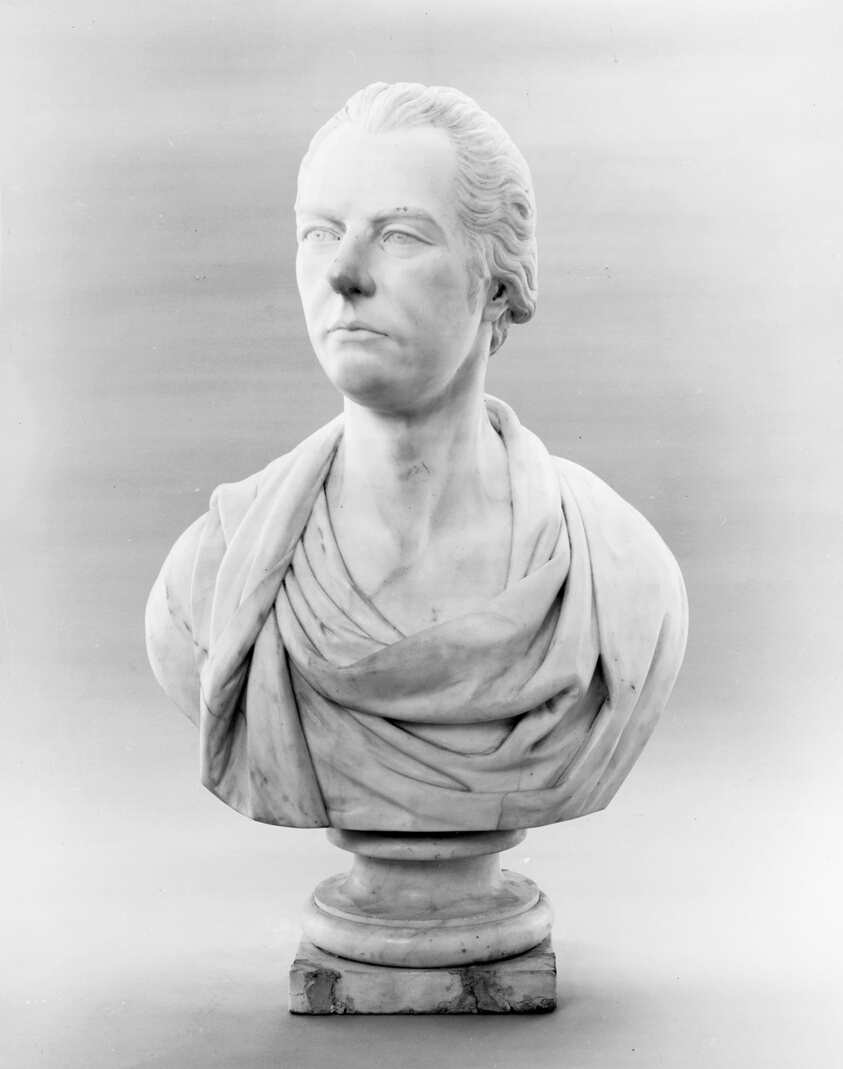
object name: Sculpture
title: Bust of William Pitt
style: nineteenth century, 19th century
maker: After Joseph Nollekens (English, 1737–1823)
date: c. 1820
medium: Marble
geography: England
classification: bust/head; sculpture; portrait; british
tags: portraits: male subject, busts, head, man, portrait, portraits